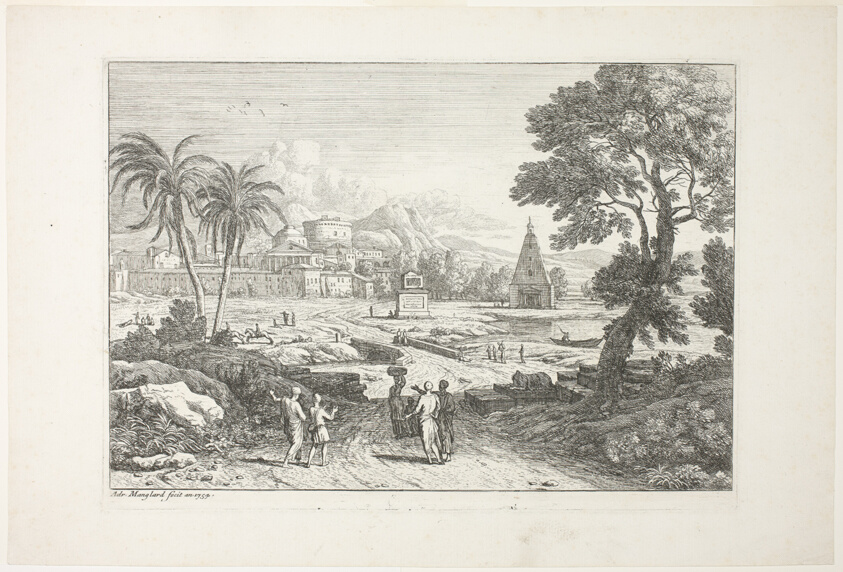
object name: Print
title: Landscape with Two Palms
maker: Adrien Manglard (French, 1695-1760)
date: 1752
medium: Etching on ivory laid paper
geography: France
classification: print; etching; prints and drawing